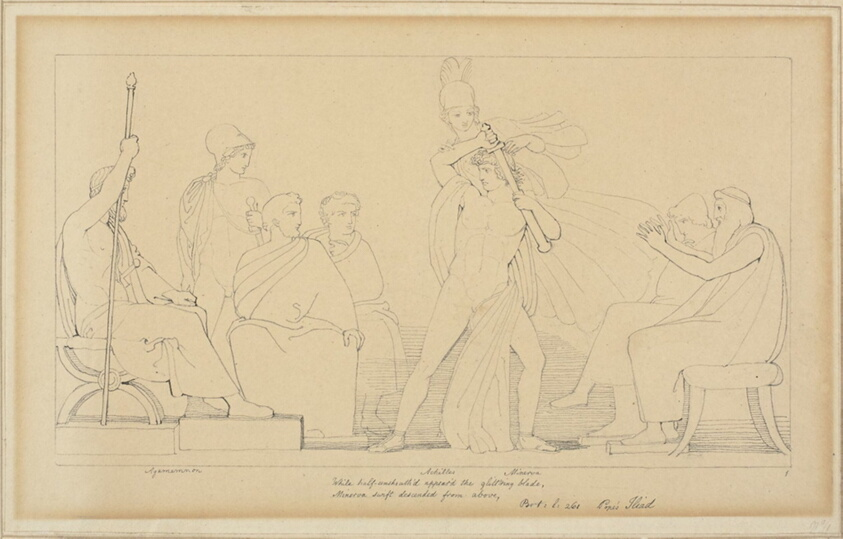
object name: Drawing and Watercolor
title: Minerva and Achilles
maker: John Flaxman, II; English, 1755-1826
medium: Pen and gray and brown ink, over graphite, on tan wove paper, laid down on buff wove paper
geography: England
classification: pen and ink drawings; drawings (visual works); prints and drawing